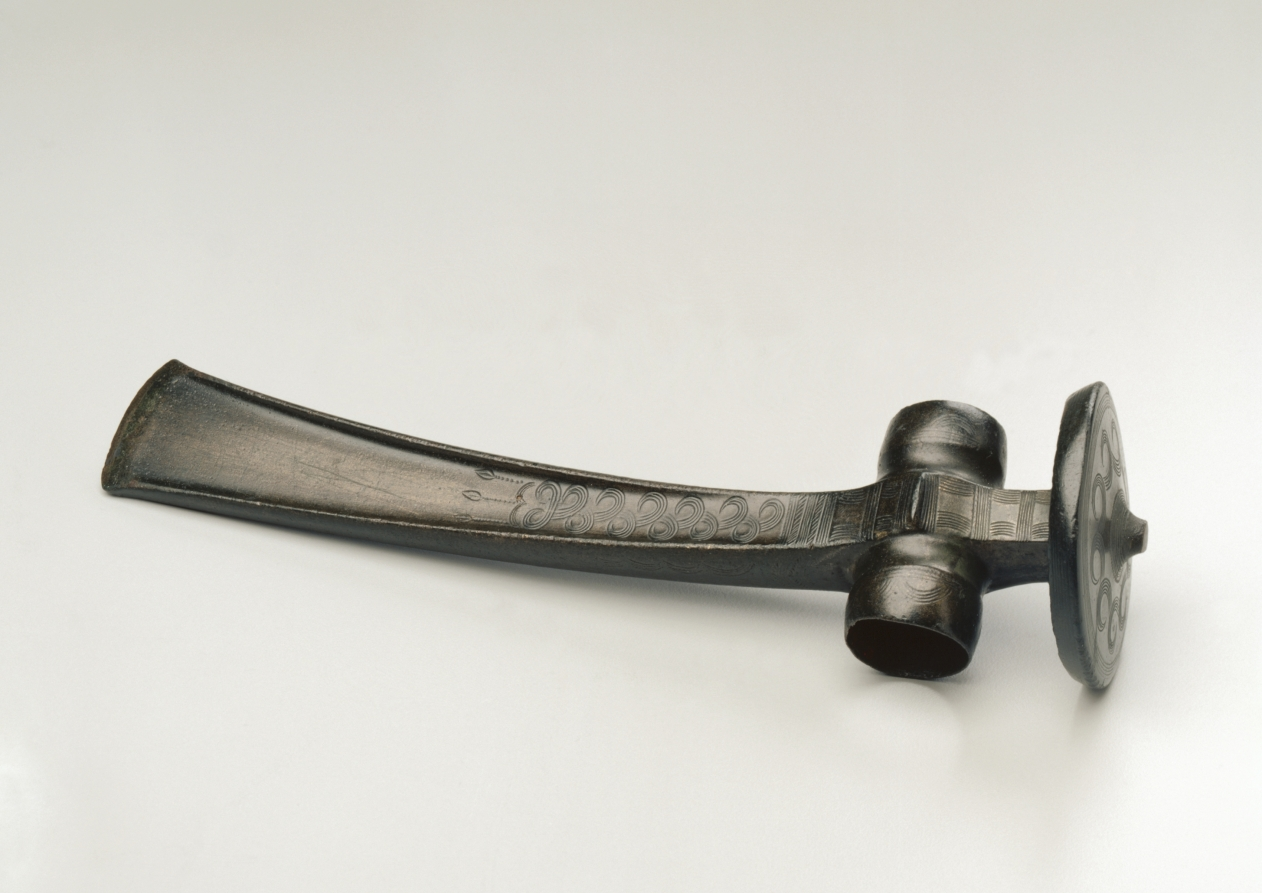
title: Battle Axe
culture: Hungary, Bronze Age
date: c. 1500 BCE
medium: bronze, solid-cast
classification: Metalwork